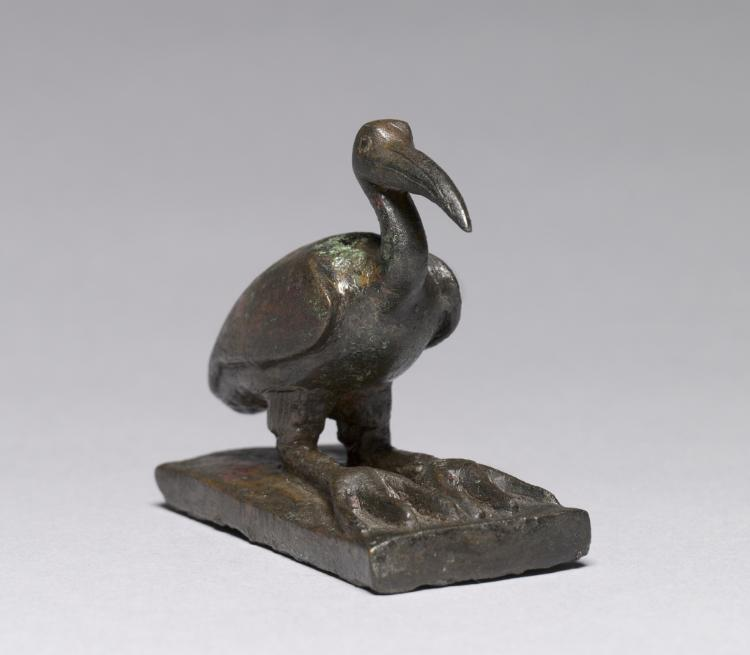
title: Ibis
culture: Egypt, Late period (715–332 BCE), Dynasty 26 or later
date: 664–30 BCE OR 664–330 BCE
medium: bronze, solid cast, with gold-rich inlays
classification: Sculpture